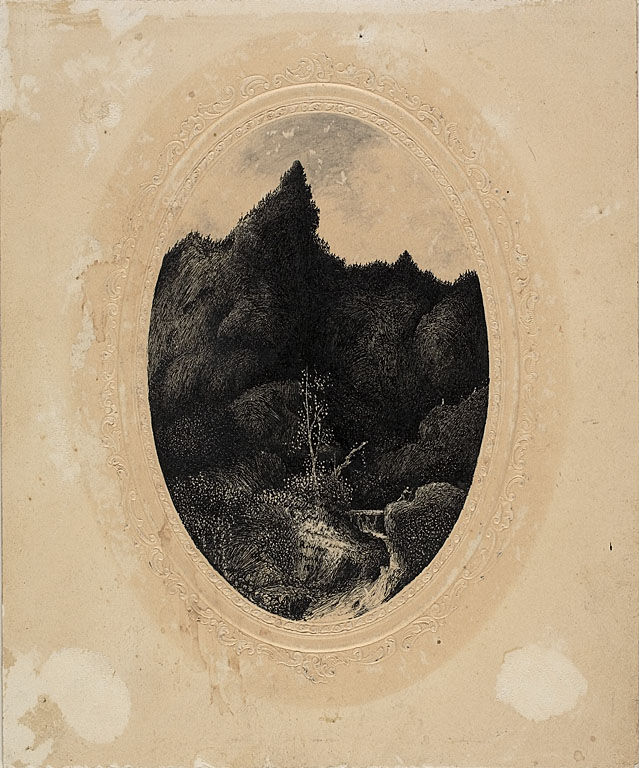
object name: Drawing and Watercolor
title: The Traveler in the Mountains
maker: Rodolphe Bresdin (French, 1825-1885)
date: 1870/79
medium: Pen and black ink with brush and gray wash, on tan embossed card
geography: France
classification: pen and ink drawings; drawings (visual works); prints and drawing